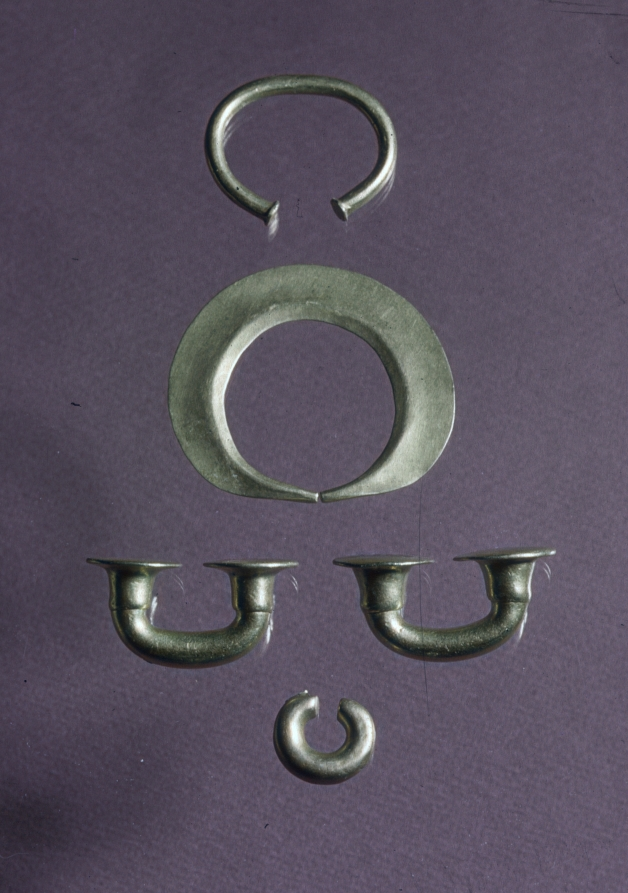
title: Nose Ornament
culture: Colombia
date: before 1550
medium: cast gold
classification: Jewelry